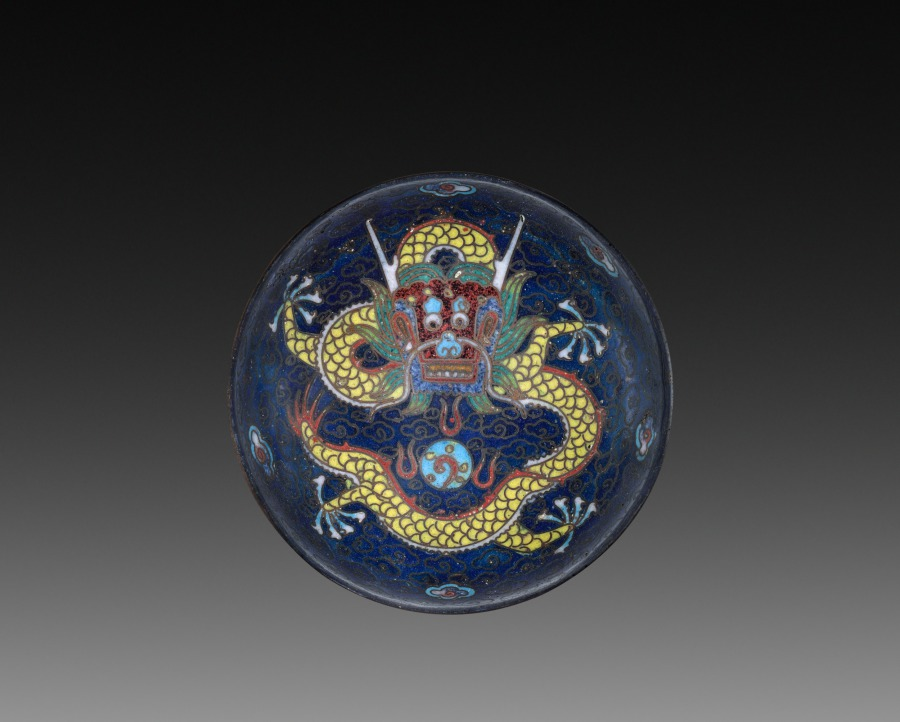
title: Box with Dragon (lid)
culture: Japan, Meiji period (1868–1912) to Taishō period (1912–26)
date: c 1900– 1925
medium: cloisonne enamel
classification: Enamel